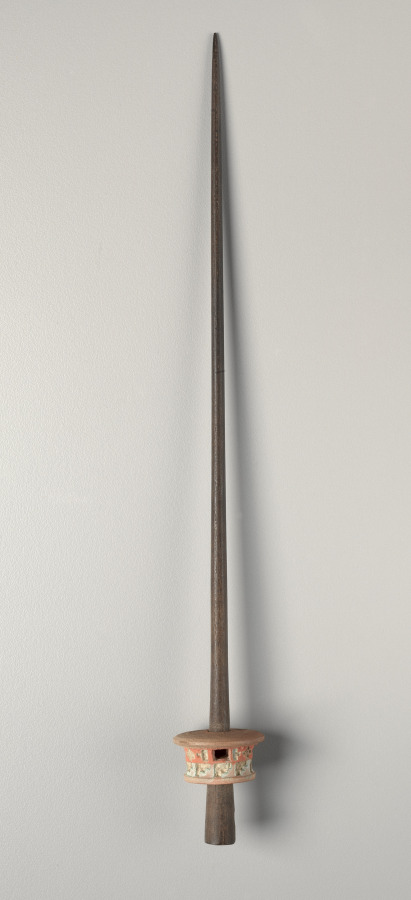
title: Spindle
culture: Peru, South Coast, Wari Culture, Tiwanaku Style, 7th-10th Century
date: c. 600–1000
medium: wood with carved clay whorl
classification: Spindle Whorl